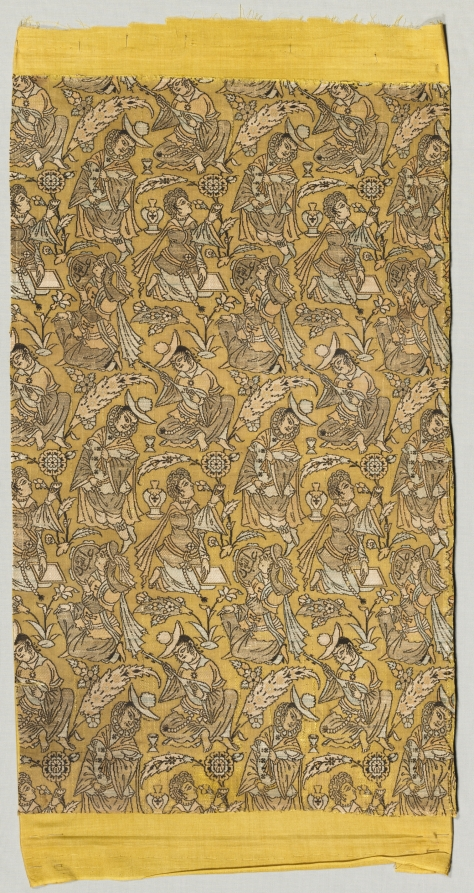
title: Lampas with dancers and musicians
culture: Iran, Safavid period (1501–1722)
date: 1600–1650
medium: silk and silver-metal thread: lampas, brocaded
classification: Textile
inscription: on the tambourine of one of the musicians is inscribed: "Abdallah."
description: This sturdy silk with extensive silver-metal thread displays a dancer and musicians in varied Iranian and European attire, including curved-brim Portuguese or Dutch hats, that reflect the cosmopolitanism initiated by Shah ‘Abbas (reigned 1587–1629). The figures in this landscape are about the same size and equally spaced with minimal interaction, yet they create movement that disguises the repeat of the design. Although the history of textiles is replete with anonymity, signed silks were woven in Iran around 1600. The name of the presumed designer, Abdallah, appears in cursive script on the tambourines. The rise of signed textiles followed a shift away from royal manuscript patronage, causing artists to sign their work to sell in the marketplace. European influence, a new distinguishing hallmark, was transmitted through engravings by traveling European artists.